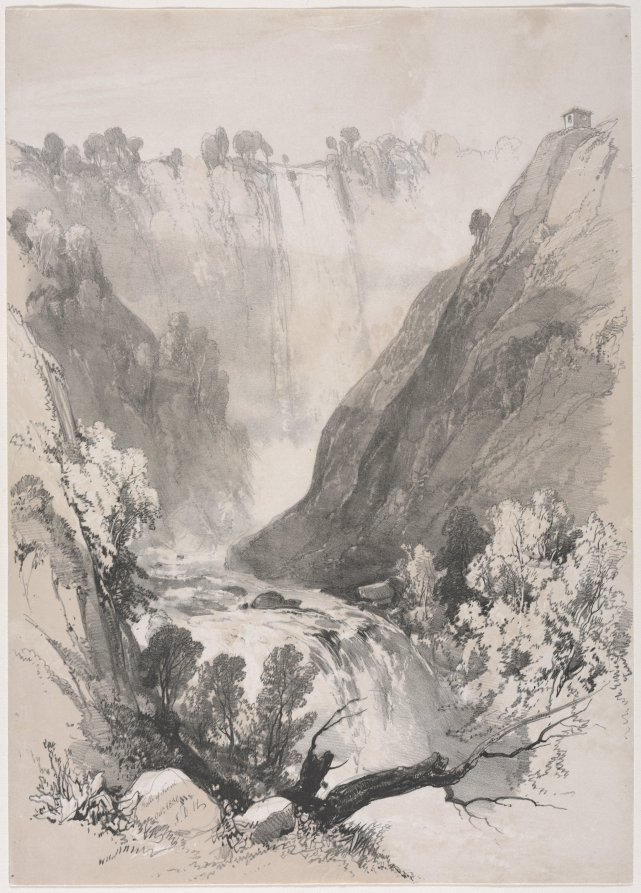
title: Sketches at Home and Abroad: Falls of Terni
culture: England, 19th century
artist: James Duffield Harding (British, 1798–1863)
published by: Charles Tilt, Fleet Street, London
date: 1830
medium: lithograph with tint stone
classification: Print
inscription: inscribed lower left in stone: Falls of Terni, Octr. 1830, J.D.H.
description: A watercolor painter and printmaker, Harding was one of the best-known artists of his day in England. A popular instructor, he taught poetry of landscape painting, admonishing his students to "produce as near a likeness to Nature, in every respect, as the instrument, or material employed, will admit of; not so much by bonâ fide imitation, as by reviving in the mind those ideas which are awakened by a contemplation of Nature . . . The renewal of those feelings constitutes the true purpose of Art." Harding began to draw on colored paper in 1830 and copied this effect in lithography by utilizing a second stone printed in gray or ocher. Unlike the drawings, however, the color in the prints is not merely a background for the design but is an active element in it. To achieve an appearance of wash and delicate effects, Harding worked with the leading lithographic printer in London at the time, Charles Hullmandel, who improved and developed many new printing techniques.